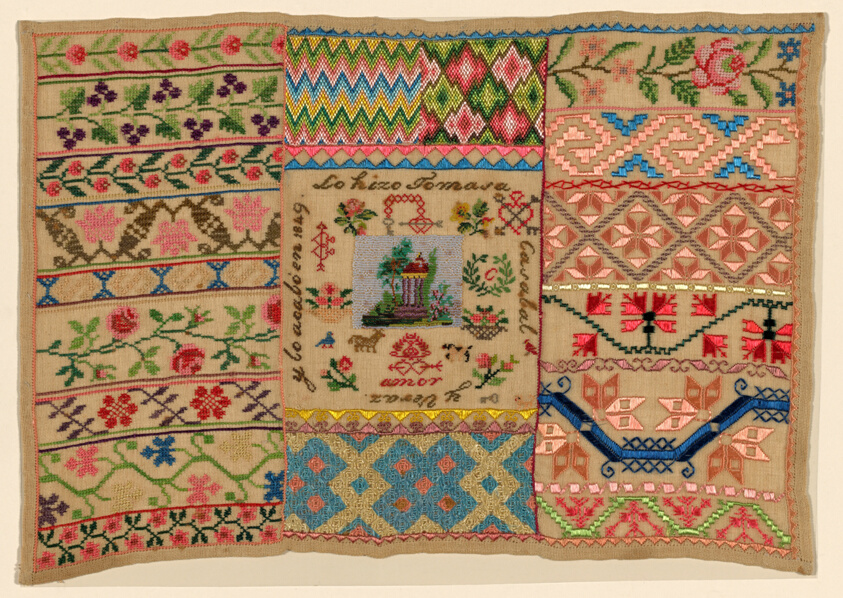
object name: Textile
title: Sampler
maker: Mexico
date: 1849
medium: Cotton, plain weave; cut and drawn work embroidered with silk in overcast stitches; embroidered in double running and long-armed cross stitches; beaded with glass beads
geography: Mexico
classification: textile; needlework (visual works)